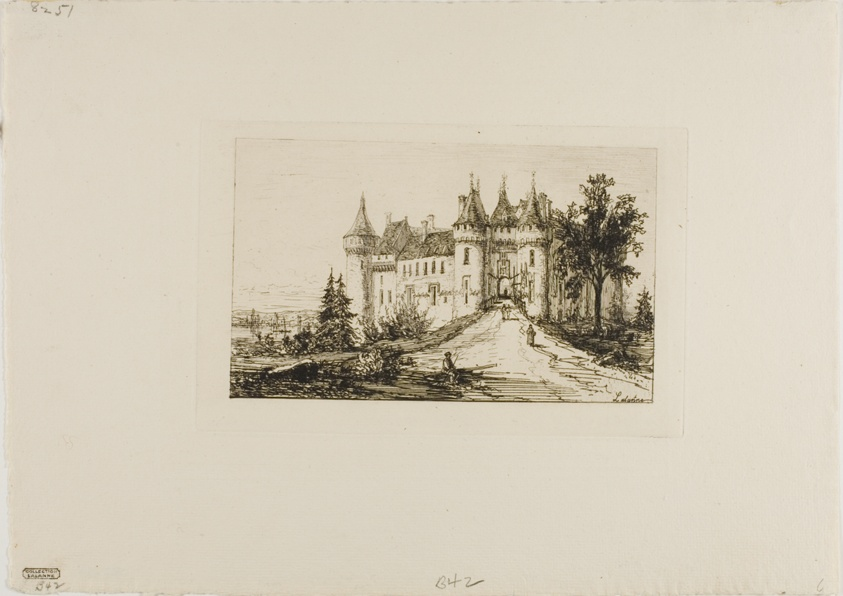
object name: Print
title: Château de Chaumont, Touraine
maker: Maxime Lalanne (French, 1827-1886)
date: 1869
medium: Etching on ivory laid paper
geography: France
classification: etching; print; prints and drawing